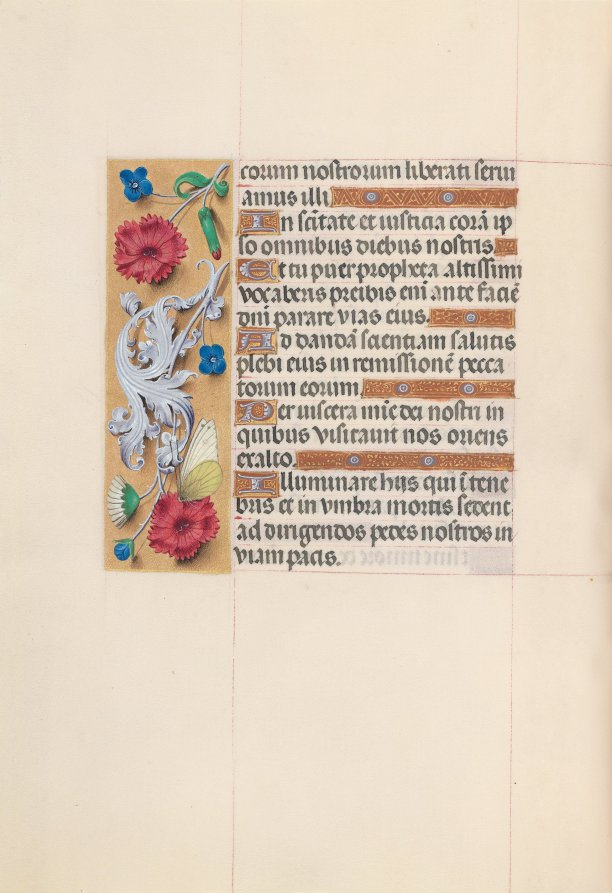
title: Hours of Queen Isabella the Catholic, Queen of Spain: Fol. 59v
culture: Flanders, Ghent and Bruges, late 15th century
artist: Master of the First Prayerbook of Maximillian (Flemish, c. 1444–1519)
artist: and Associates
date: c. 1500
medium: ink, tempera, and gold on vellum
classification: Bound Volume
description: This manuscript was illuminated by a circle of at least five highly organized manuscript painters active in the Flemish cities of Ghent and Bruges. The principal illuminator was Alexander Bening, who painted the majority of the book's miniatures. Manuscripts produced by this circle of artists are renowned for the decoration of their borders, which typically feature a rich variety of realistically-painted flowers, birds, and butterflies. This prayer book, called a book of hours, was intended not for a cleric, but for the private devotions of a lay person-in this case, Isabella the Catholic, Queen of Spain (1451-1504). Isabella's coat of arms embellishes the book's frontispiece. It is unlikely that the book was commissioned by the Queen herself; rather, she probably received it as a diplomatic gift from someone courting her patronage, perhaps Cardinal Francisco Jimenez de Cisneros. A Franciscan friar, Jimenez was dependent upon Isabella for his advancement, first to the post of Queen's confessor in 1492, and then to Archbishop of Toledo in 1495.